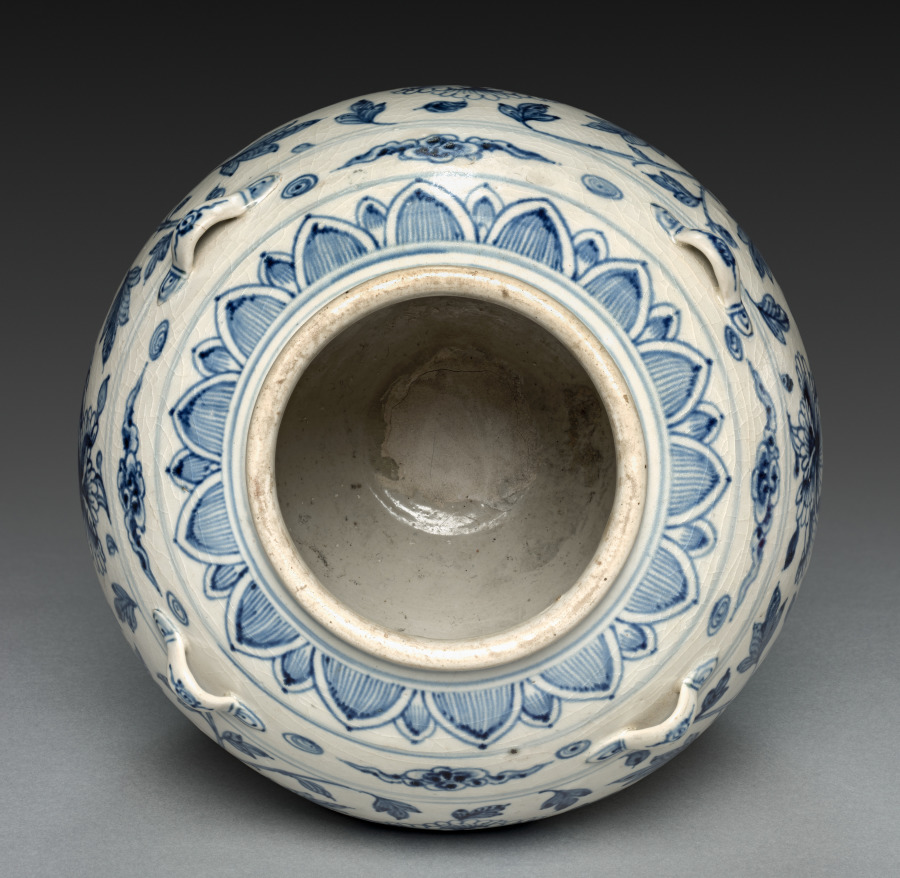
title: Storage Jar: Blue-and-White Ware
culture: Vietnam (Annam)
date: 1300s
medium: porcelain with underglaze blue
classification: Ceramic